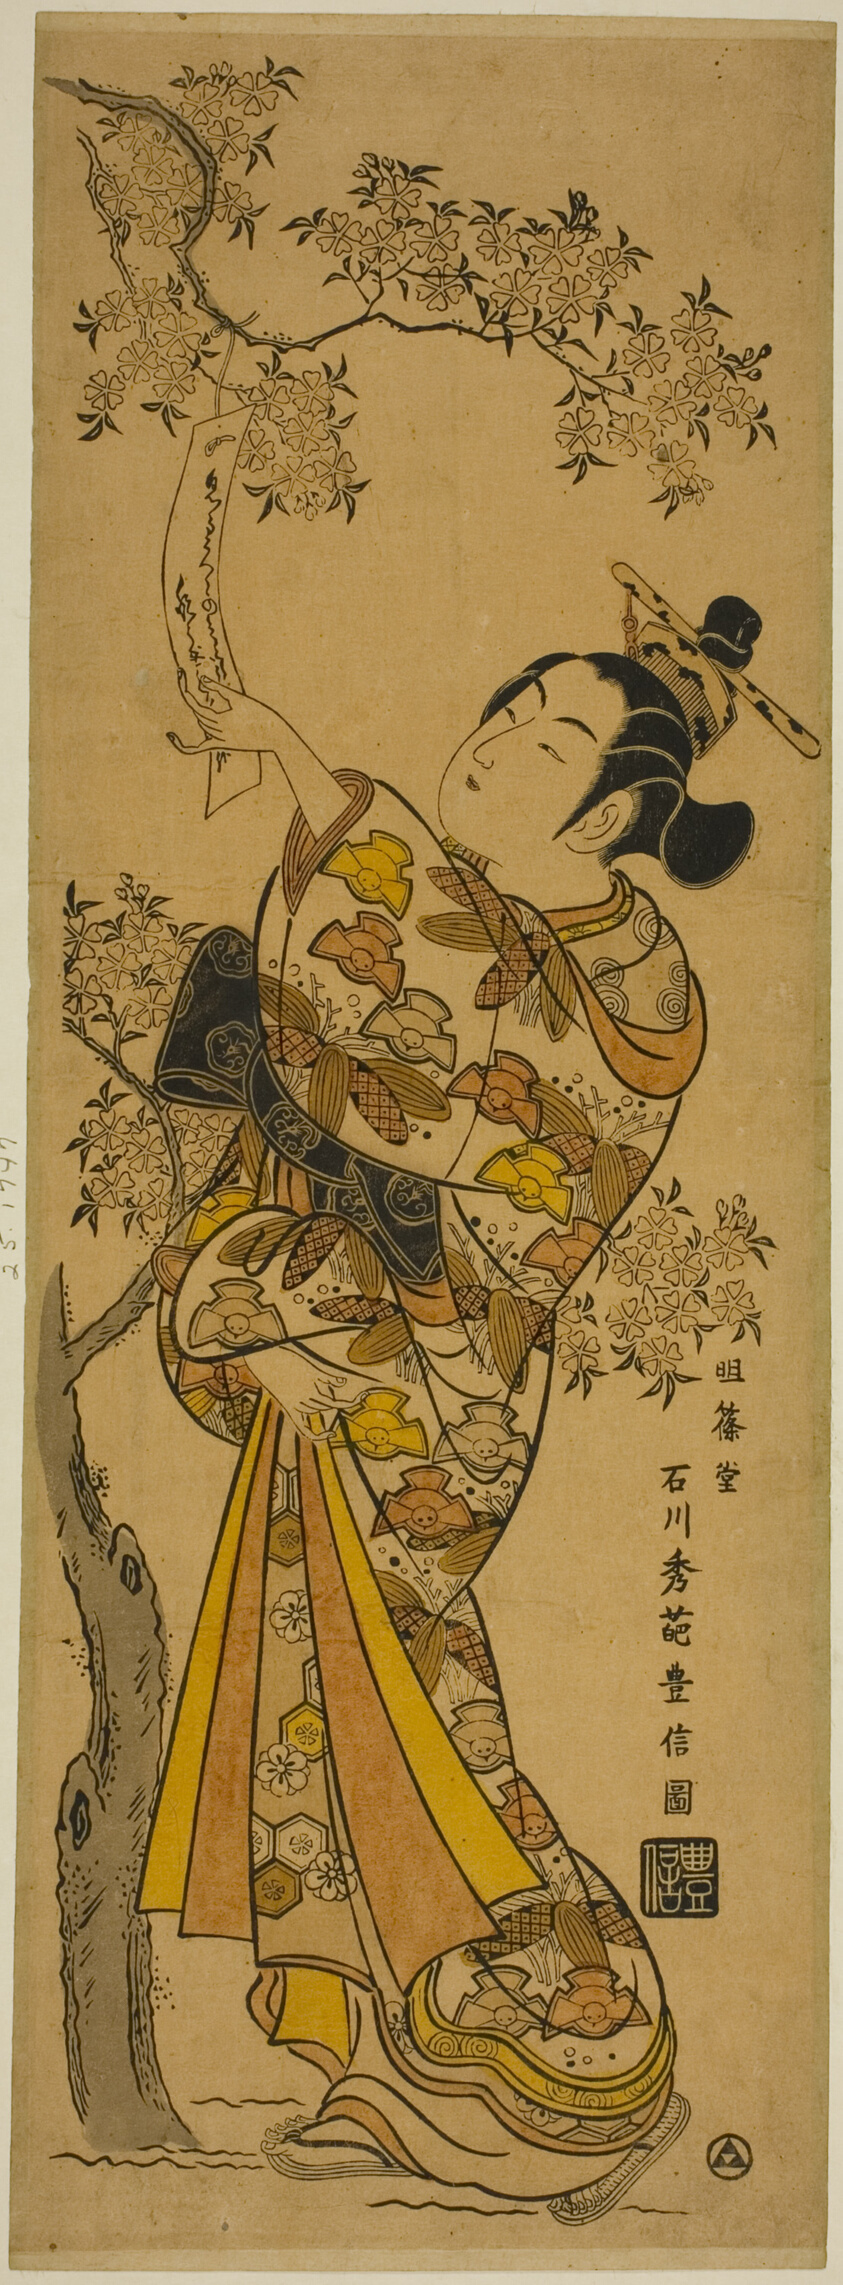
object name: Print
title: Young Woman Reading Tanzaku Tied to a Cherry Tree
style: Japanese (culture or style)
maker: Ishikawa Toyonobu (Japanese, 1711-1785)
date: c. 1741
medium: Hand-colored woodblock print; kakemono-e, urushi-e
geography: Japan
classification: woodblock print; print; asian art